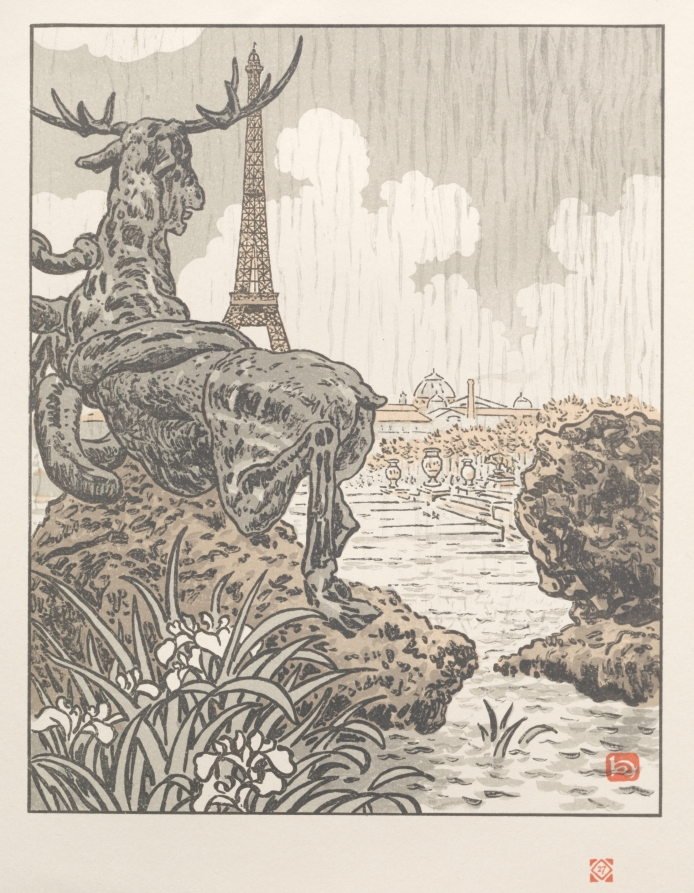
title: Thirty-Six Views of the Eiffel Tower: From Behind Frémiet's Elk (Trocadero)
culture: France, early 20th century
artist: Henri Rivière (French, 1864–1951)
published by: Printed by Verneau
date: 1902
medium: color lithograph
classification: Print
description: This view of Trocadero Park features one of the sculptures that surrounded a large basin that collected water from a large cascade. The sculpture of an elk stuggling with a boa constrictor was made only of plaster and was almost completely destroyed by 1910. The sculptor, Emmanuel Frémiet, studied animals at the botanical gardens in Paris, which exhibited both flora and fauna.